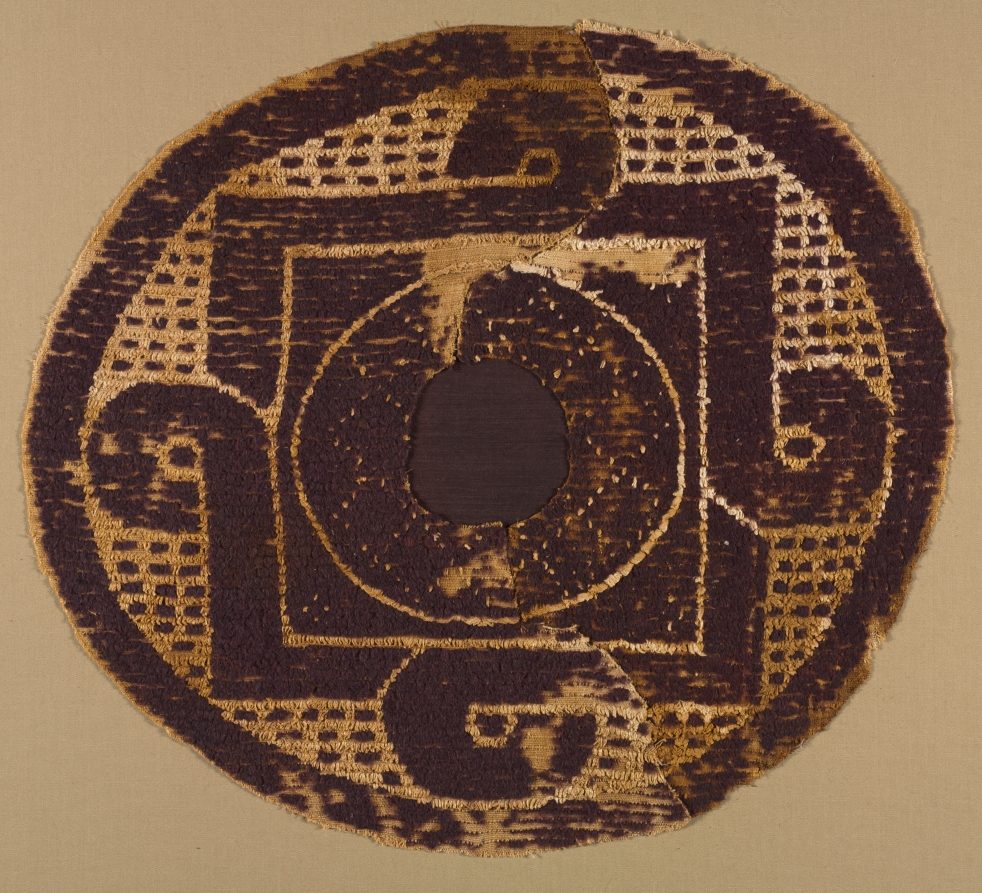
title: Roundel from a Blanket or Cover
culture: Egypt, Byzantine period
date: 300s–400s CE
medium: tapestry weave with supplementary weft wrapping; undyed linen and dyed wool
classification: Textile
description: Since pharaohs ruled ancient Egypt, linen cloth was woven with woolen loops for increased warmth and used as blankets and covers. Monochrome or single-color decoration as seen here dates this piece to the AD 300s. Polychrome or multicolor designs came later. Formed with deep purple wool and natural linen, the design consists of an outer circle with a knotted square inside.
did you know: The center element has been lost.